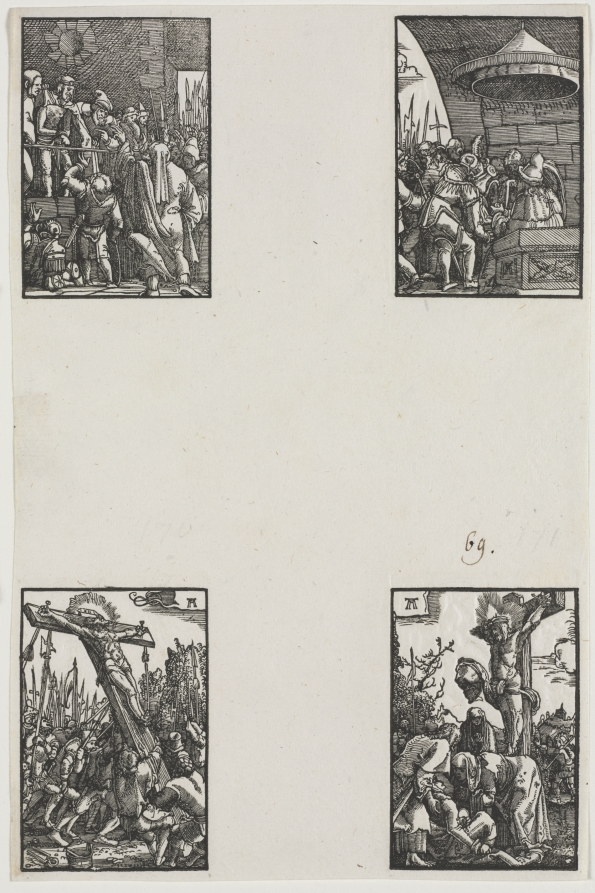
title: The Fall and Redemption of Man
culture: Germany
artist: Albrecht Altdorfer (German, c. 1480–1538)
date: c. 1515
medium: woodcut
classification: Print